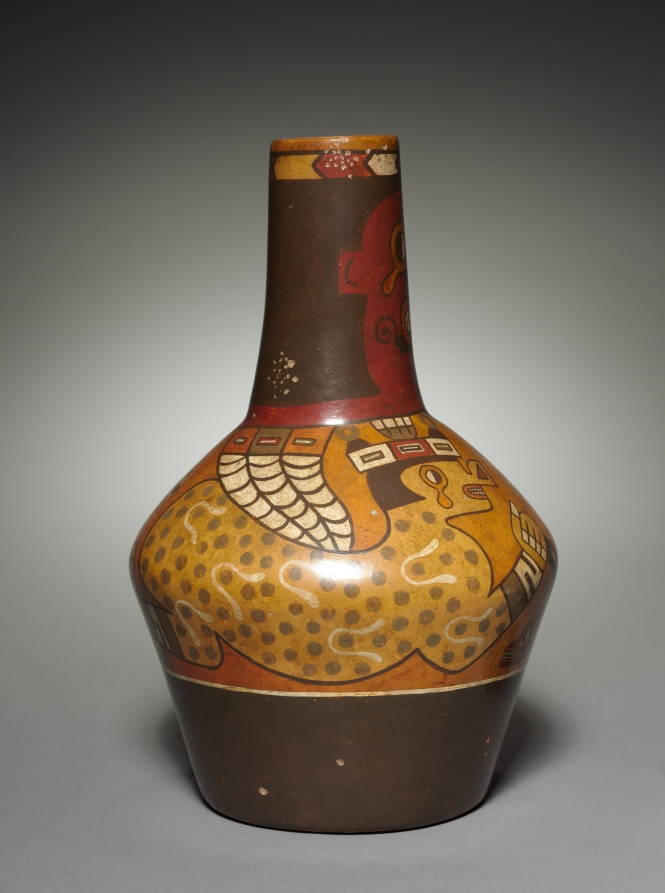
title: Vessel (modern version of a Wari-style vessel)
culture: Peru, modern, 20th century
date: before 1955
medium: pottery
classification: Forgery